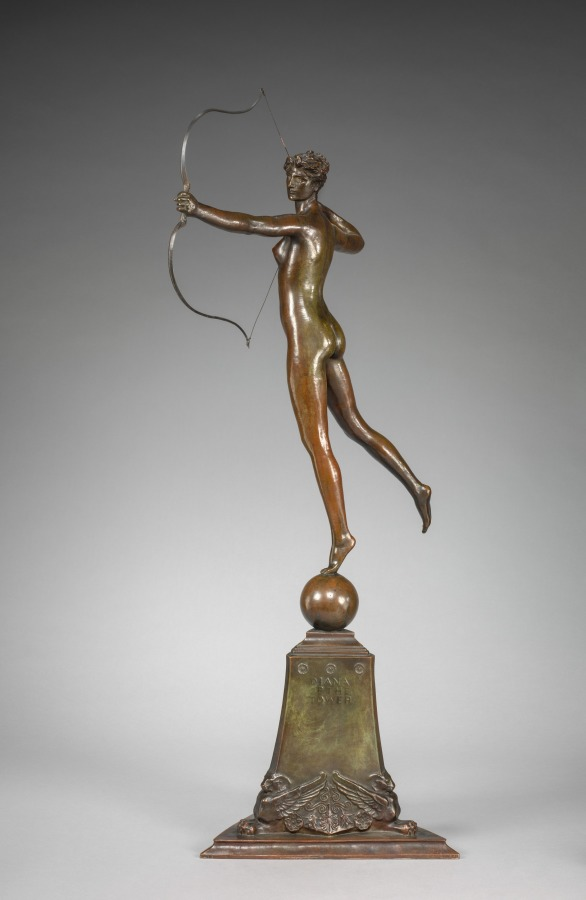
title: Diana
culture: America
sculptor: Augustus Saint-Gaudens (American, born Ireland, 1848–1907)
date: modeled 1899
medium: bronze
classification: Sculpture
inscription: Signed and dated on base: AUGUSTUS SAINT GAUDENS, MDCCCXCIX; inscribed on triangular base: DIANA OF THE TOWER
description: Depicting the Roman goddess of the hunt, Diana is a small version of the massive weathervane Augustus Saint-Gaudens designed for the second iteration of Madison Square Garden in New York, a building that was demolished in 1925. Although controversial for its nudity, the weathervane dominated the city's skyline and became a prominent landmark. Due to its popularity, Saint-Gaudens marketed tabletop versions of the sculpture, which were sold through high-end retailers such as Tiffany and Co.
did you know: The face of Diana was inspired by Davida Johnson Clark, the artist's longtime model, muse, and lover.